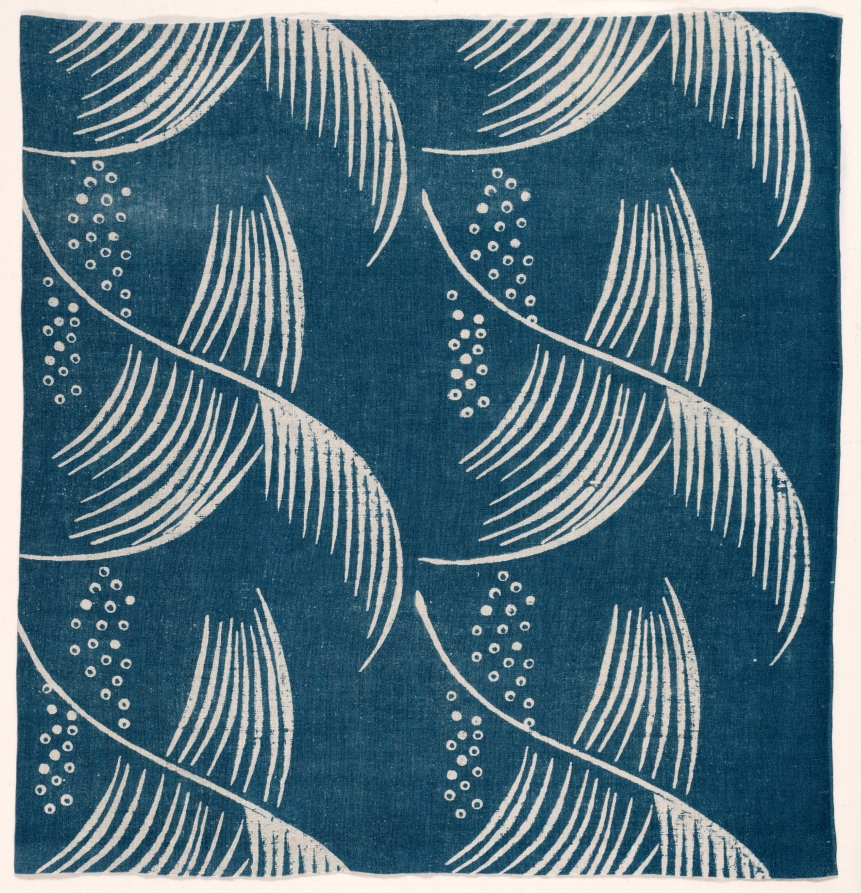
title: Fragment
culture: England, 20th century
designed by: Dorothy M. Larcher (British, 1884–1952)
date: 1933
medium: block printed cotton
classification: Textile